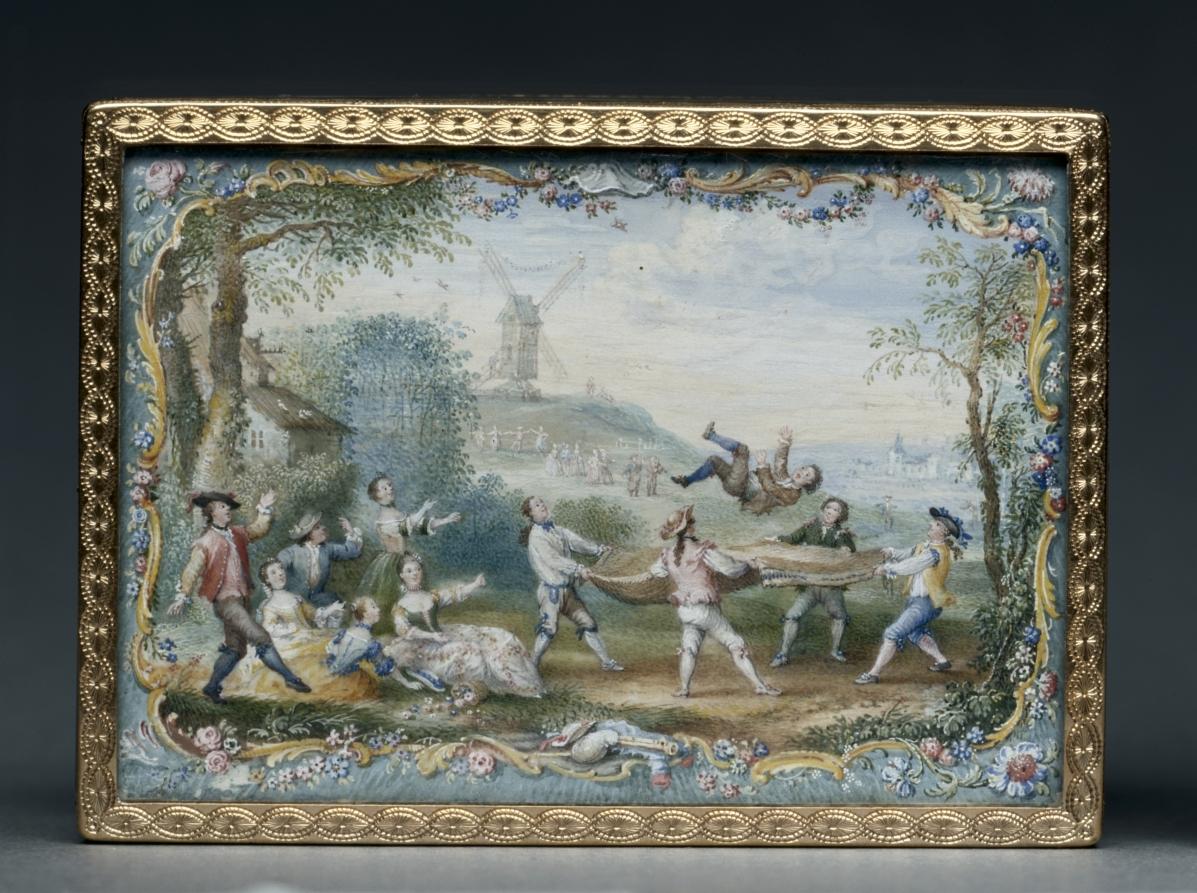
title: Snuff Box (Tabatière)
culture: France, 18th century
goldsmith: Jean Ducrollay (French, 1709–1787)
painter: Louis Nicolas van Blarenberghe (French, 1716–1794)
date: 1753–54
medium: gold and glass with miniatures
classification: Metalwork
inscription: [Maker's mark of Jean Ducrollay, master goldsmith in 1734, inside cover; bottom; right side]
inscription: [Charge mark of Julien Berthe, Paris, 1750-1756, inside cover; bottom; right side]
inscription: [Discharge mark of Julien Berthe, Paris, 1750-1756, on bezel]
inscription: [Inscribed on miniature, front side]: "V.[an] Blarenberghe/1753"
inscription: [Warden's mark for Paris, 1763-1754, inside cover; bottom; right side]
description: In 18th-century France ornately enameled boxes that held snuff—powdered tobacco—became a popular accessory in the French court. This object’s rectangular shape differs from early work attributed to Jean Ducrollay. Though the light colors, floral borders, and depictions of lively outdoor recreation are representative of earlier rococo imagery, the rectangular shape and simple frieze make it a primary example of rising neoclassicism.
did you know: The Ducrollay family was one of the most sought-after Parisian goldsmith workshops under the reign of French King Louis XV.